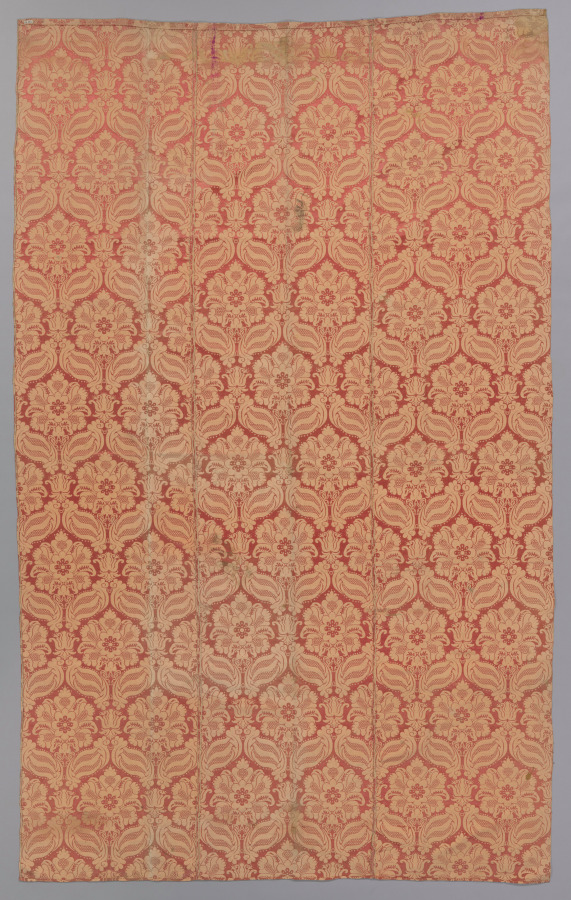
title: Textile Panel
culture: Italy, 17th century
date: 1600s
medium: lampas weave, silk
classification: Textile